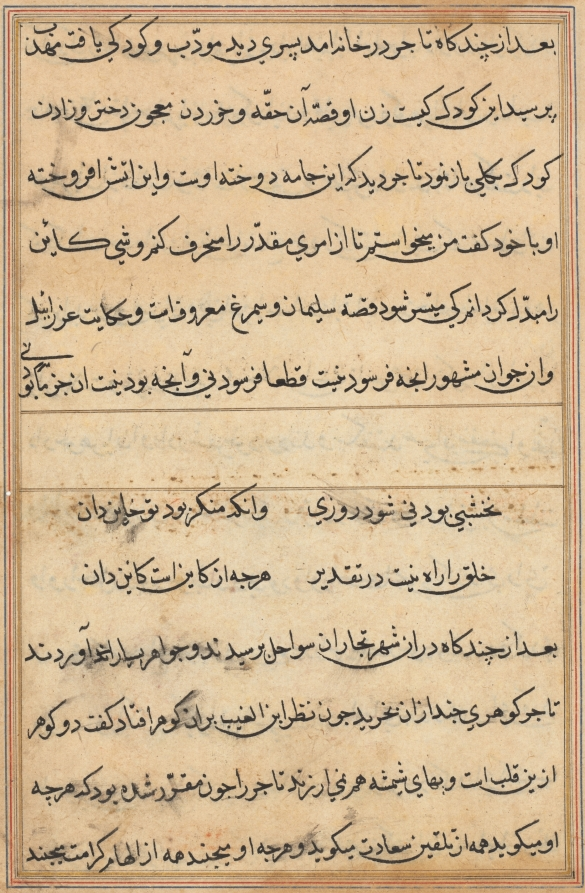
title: Page from Tales of a Parrot (Tuti-nama): text page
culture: Mughal India, court of Akbar (reigned 1556–1605)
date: c. 1560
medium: gum tempera, ink, and gold on paper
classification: Painting